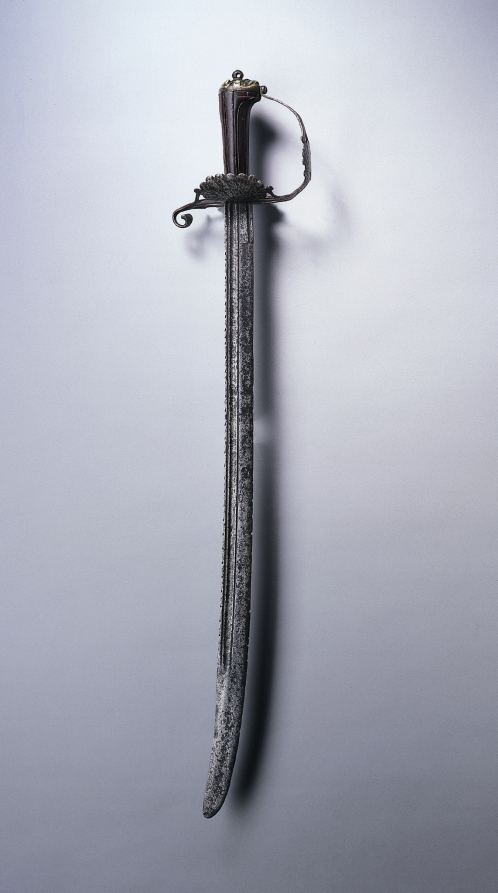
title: Hunting Sword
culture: Netherlands, early 1700s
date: c. 1700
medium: steel, wood, brass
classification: Arms and Armor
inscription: IOHAN VINNDT / NICHOLAS DORRAN